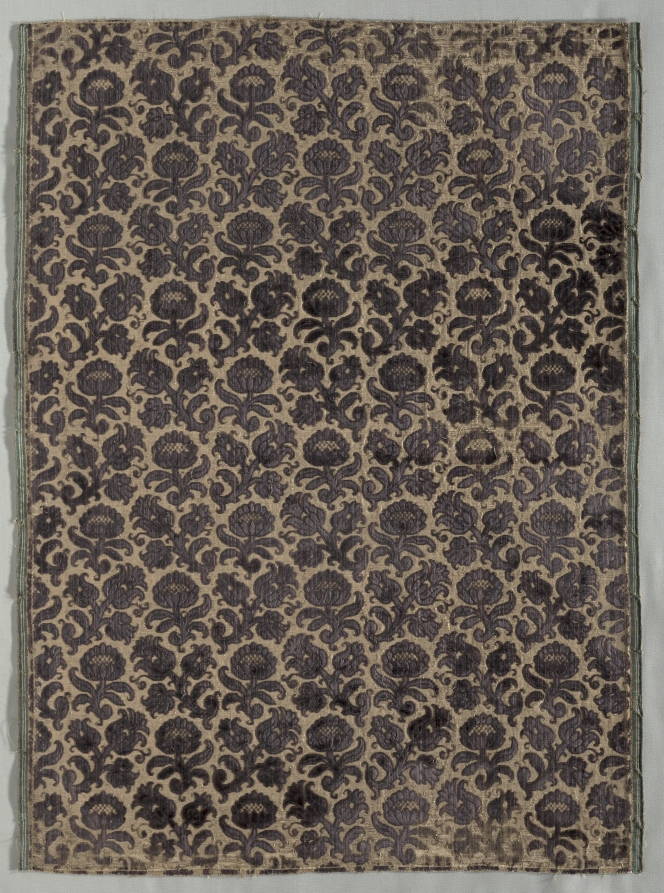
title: Length of Velvet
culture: Italy, first third of 17th century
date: 1600–1640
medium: velvet (cut, voided, and brocaded): silk and gold thread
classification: Velvet